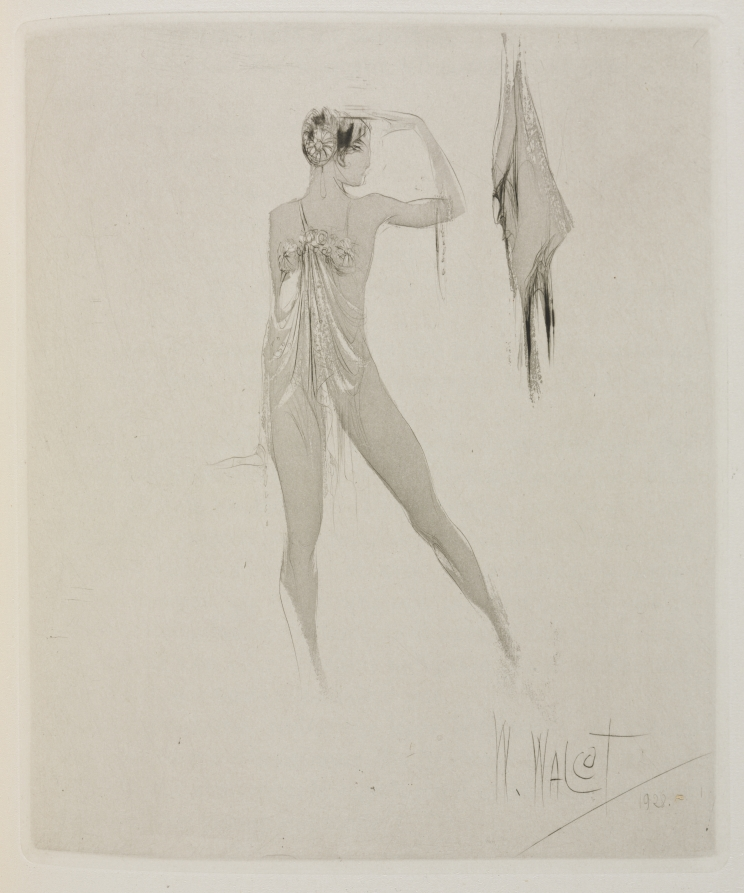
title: Herodias: Page 47, Her feet stepped one before the other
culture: England, 20th century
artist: William Walcot (British, 1874–1943)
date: 1928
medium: etching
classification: Print